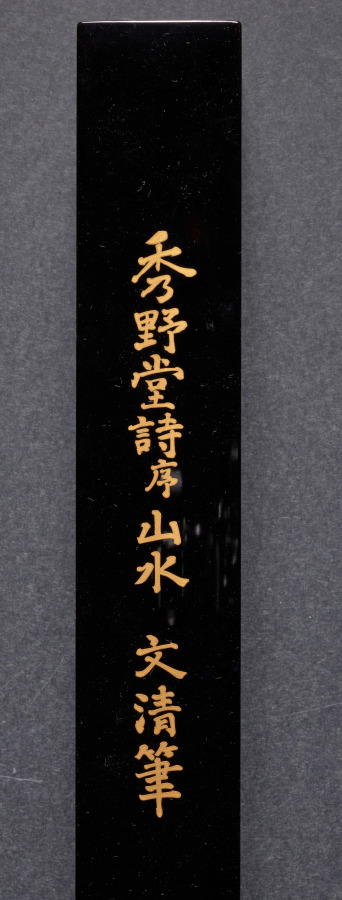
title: Shuyadō (Studio of Lofty Rusticity)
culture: Japan, Edo period (1615–1868)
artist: after Bunsei (Muncheong) (Japanese or Korean, active mid-15th century)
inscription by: after Chikuan Daien (Japanese, 1362–1439)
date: 1700s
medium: hanging scroll, ink on paper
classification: Painting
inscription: inscription by Chukuan Daien (Japanese, 1362-1439)m dated 1435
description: Hanging scrolls with assorted poems above and ink paintings below produced within Japan's Zen monastic community during the 1400s and 1500s are called poem-painting scrolls (shigajiku). This small painting was created much later in emulation of such works. While the original works often have a preface followed by poems by different monks, this composition has only a preface.